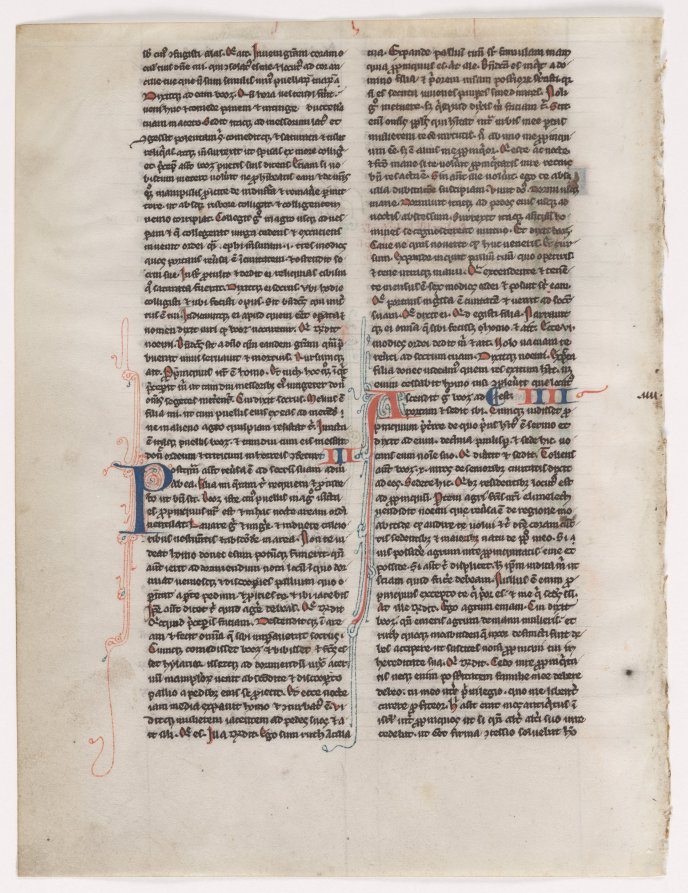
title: Initial I: Entwined Beast and Serpent: Leaf from a Bible (2 of 2 Excised Leaves)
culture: England, Glastonbury?, 13th century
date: c. 1225–1250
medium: tempera and ink on vellum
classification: Manuscript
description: Pair of Leaves from a Latin Bible: Initial I: Entwined Beast and Serpent (opening of Book of Ruth) and Initial E: Entwined Lion and Serpents (opening of the Third Book of Kings), about 1225-50 England, Glastonbury(?) Ink and tempera on vellum The Jeanne Miles Blackburn Collection [Cat. nos. 2 and 3 (CMA 1999.122)] This pair of leaves from the same one-volume Bible have been traditionally associated with the Benedictine abbey of Glastonbury in southwest England. It is known that the Bible once belonged to the English antiquary and collector, Roger Gale (1672-1744), whose library of 450 manuscripts once included two of the surviving 35 books from Glastonbury Abbey. Until its dissolution in 1539, Glastonbury was one of the greatest and wealthiest abbeys in Europe. Given its vast wealth and the recorded library lists, the abbey must have been a substantial patron of the arts. However, only a few illuminated manuscripts can now be positively identified as Glastonbury work.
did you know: The museum owns another leaf from this same bible, 1999.122.